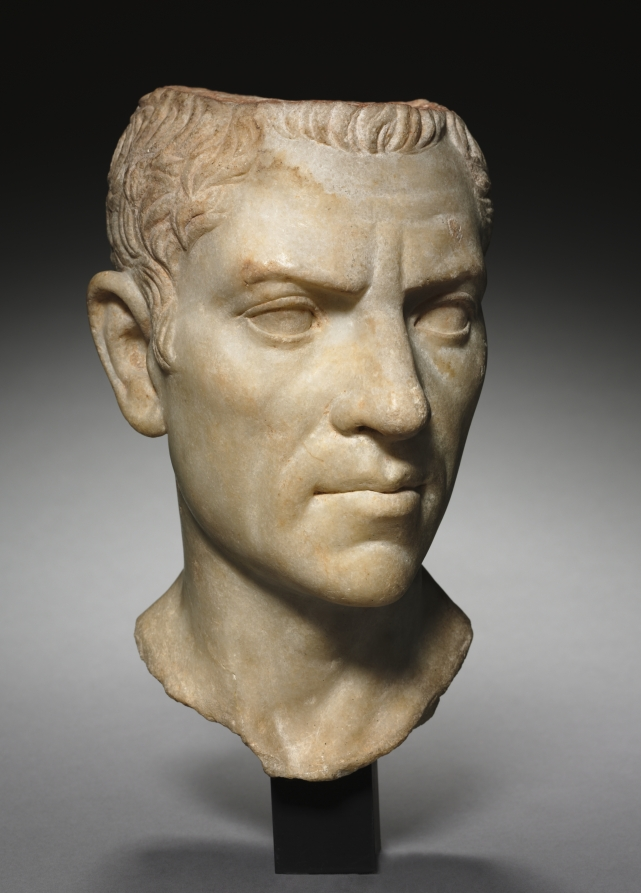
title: Portrait Head of C. Cornelius Gallus (?)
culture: Egypt, Greco-Roman period (332 BCE–395 CE), Roman empire (30 BCE–395 CE)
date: c. 30 BCE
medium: marble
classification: Sculpture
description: This highly individual portrait must have been made for a man of considerable importance. It may represent Gaius Cornelius Gallus, who lived c. 69-26 BC. After aiding Octavian in the war against Antony and Cleopatra, Gallus served as the first governor of Egypt. There he put down two rebellions, but soon fell into disgrace and exile, eventually committing suicide. The head was made to be inserted into a body, and has a flat back and top, suggesting it once wore a separately made fold of toga draped over it (in the fashion known as togatus capite velato, associated with high priests). Some scholars have suggested a later date for this portrait, perhaps in the reign of Nero or Claudius.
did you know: Traces of red paint remain, especially in the hair.